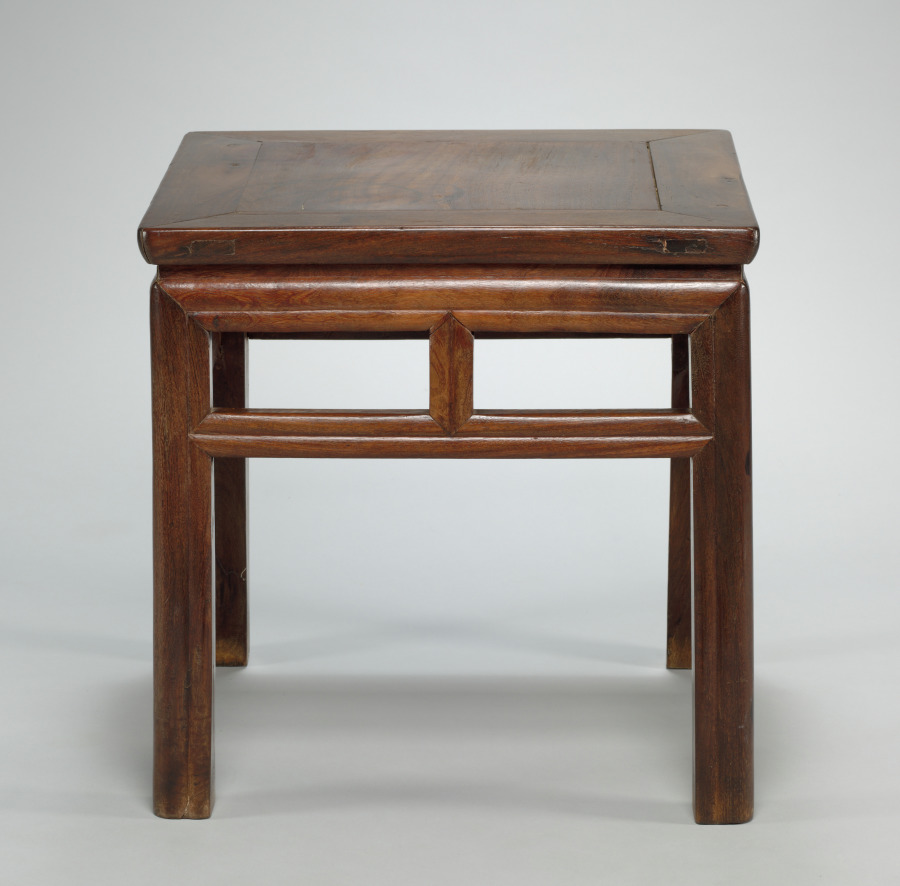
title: Stool (1 of 2)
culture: China, Qing dynasty (1644-1911)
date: 1700–1725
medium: Chicken-wing wood (jichimu)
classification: Furniture and woodwork